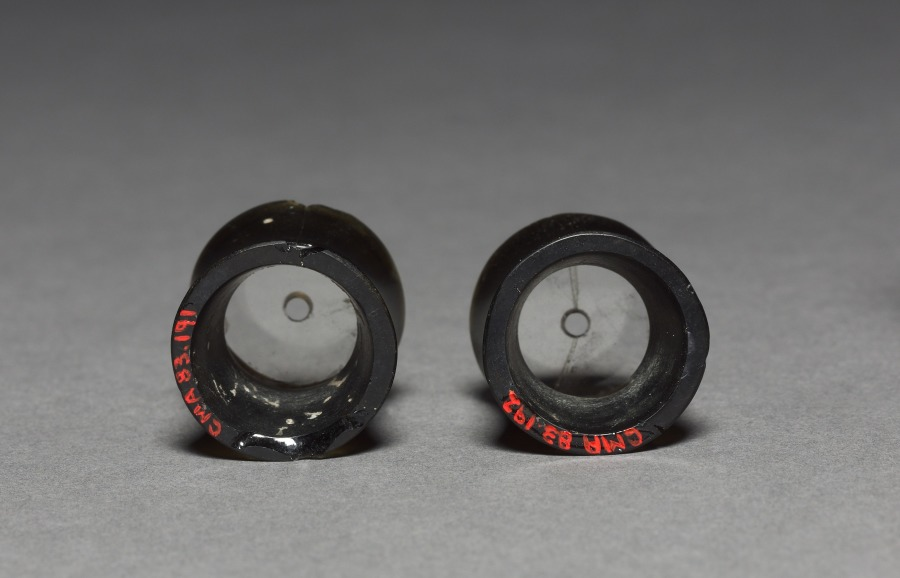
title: Pair of Ear Ornaments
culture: Mexico, Guerrero, Ichcatiopan, Mixtec or Aztec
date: c. 1200–1519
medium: obsidian, crystal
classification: Jewelry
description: This set of ear ornaments, each with a rock crystal insert, is said to have been found with a pendant made of jade and gold (1983.190). They may come from a buried offering or the tomb of an Aztec noble.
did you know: These obsidian ear ornaments look black but have a golden sheen.